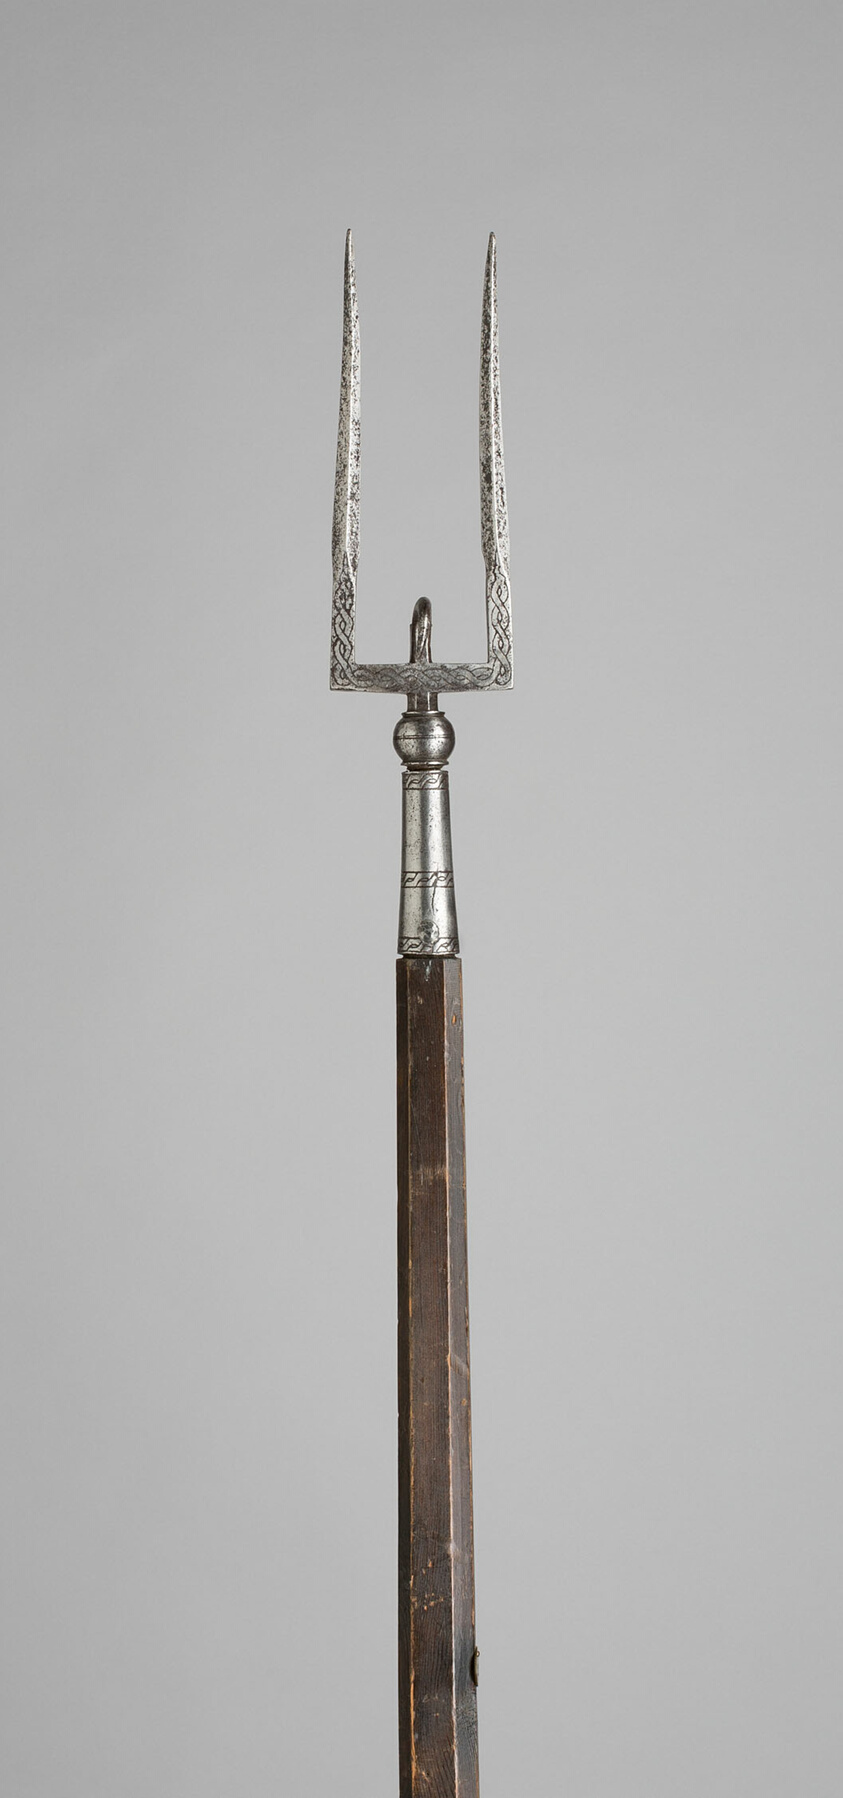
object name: Arms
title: Military Fork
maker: French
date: 1600/1700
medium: Steel and wood (modern pine)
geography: France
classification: edged weapon-staff; arms; arms and armor